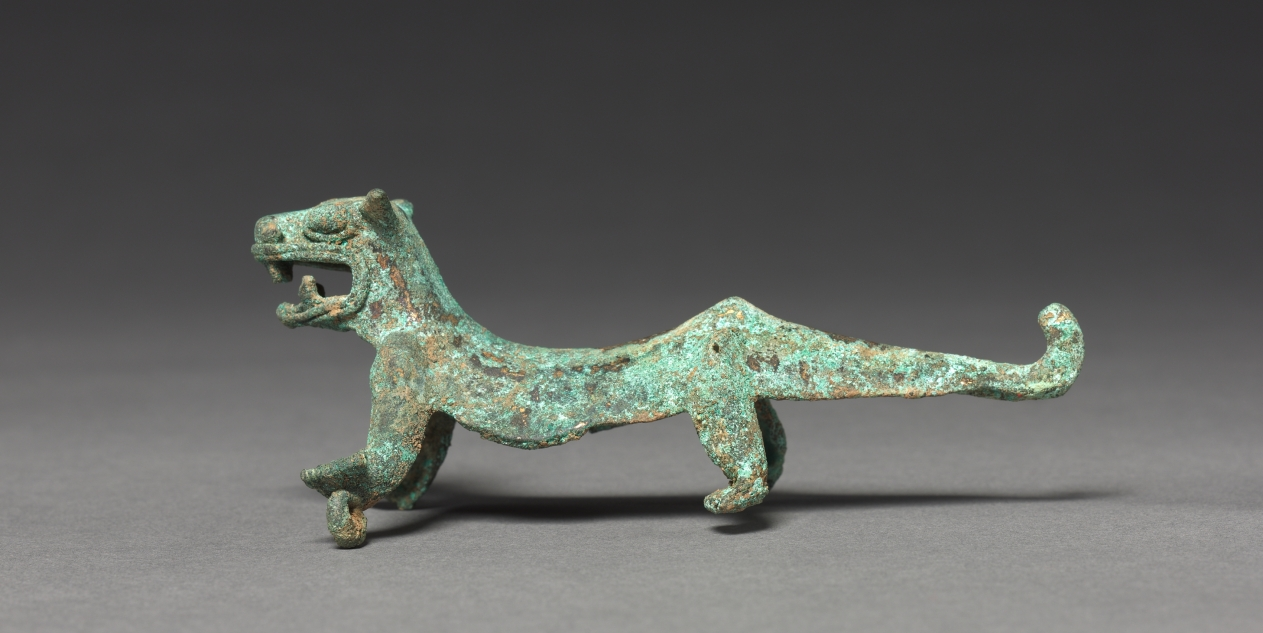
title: Jaguar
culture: Costa Rica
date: c. 1000–1500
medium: gold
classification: Metalwork